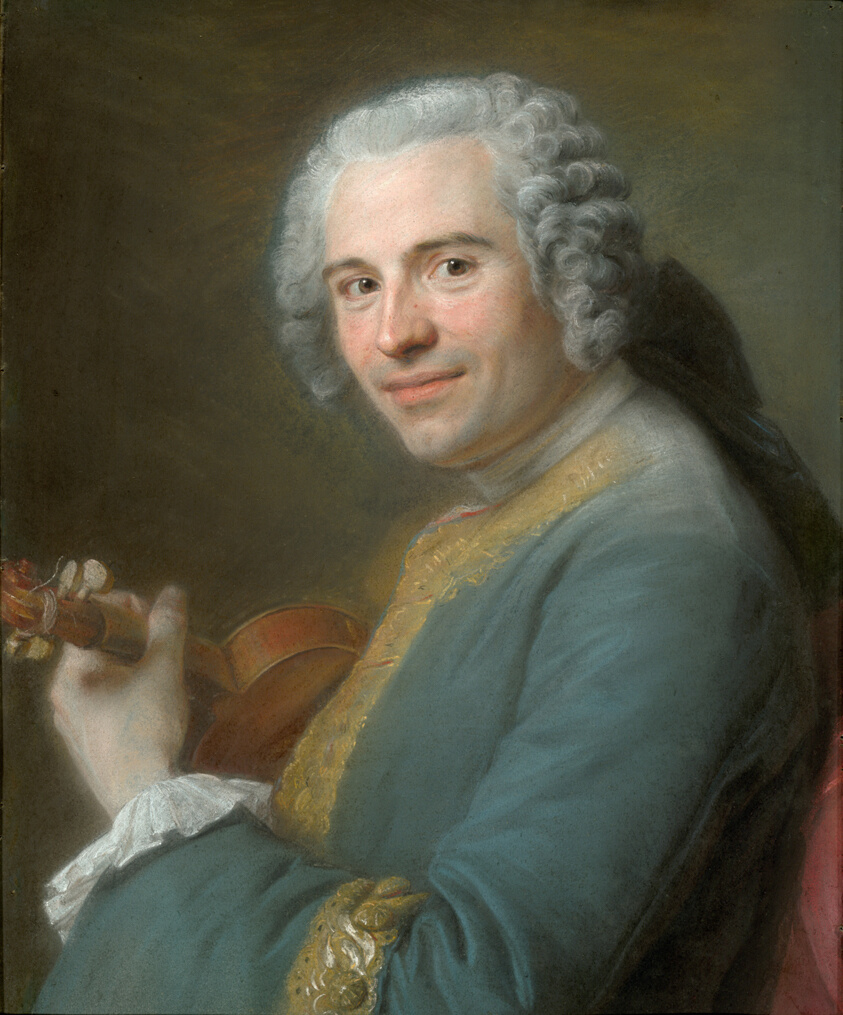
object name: Drawing and Watercolor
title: Portrait of Jean-Joseph Cassanéa de Mondonville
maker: Maurice Quentin de Latour (French, 1704-1788)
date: 1746/47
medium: Pastel on blue-gray laid paper, laid down on board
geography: France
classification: pastel; drawings (visual works); prints and drawing